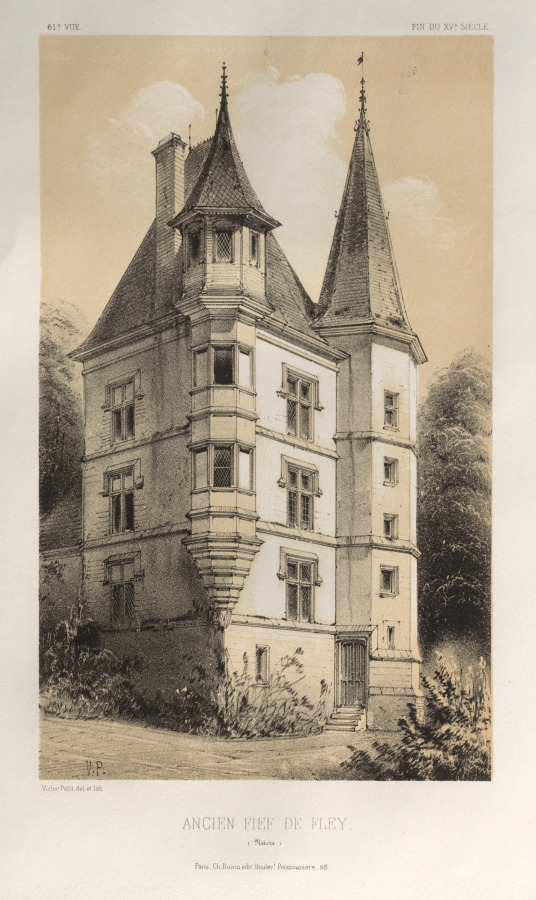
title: Architecture Pittoresque ou Monuments des XVeme. Et XVIeme. Siecles: Chateaux de France des XV et XVI Siecles: Pl. 61, Ancien Fief De Fley (Nièvre)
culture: France, 19th century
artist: Victor Petit (French, 1817–1874)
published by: Charles Boivin (publisher and editor); Lith de Godard a Paris (printer)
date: 1860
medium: lithograph with tint stone, from portfolio of 100 lithographs with tint stone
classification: Print